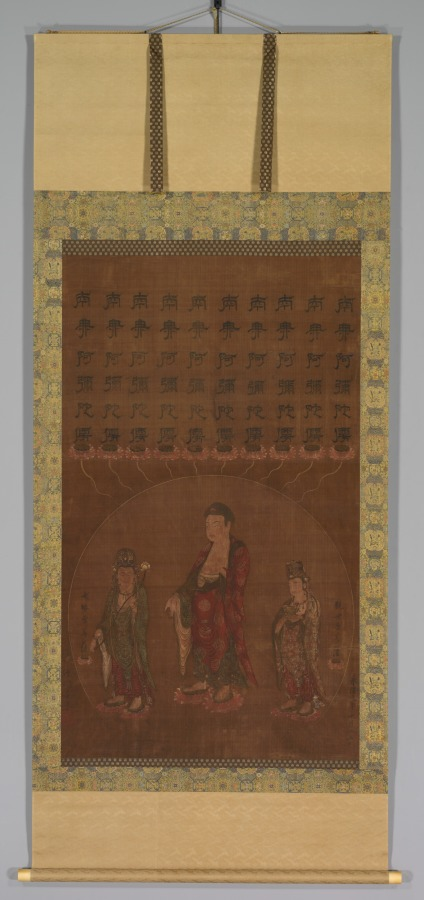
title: Buddha Amitābha with Two Attending Bodhisattvas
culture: China, Southern Song dynasty (1127-1279)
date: 1200s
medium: Hanging scroll; ink and color on silk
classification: Painting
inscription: 南無阿彌陀佛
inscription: 沙門善導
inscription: 觀世音菩薩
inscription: 大勢至菩薩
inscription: 永隆元年十月十五日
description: The supreme deities that rule over the Western Paradise—Amitābha (阿彌陀 in Chinese), Avalokiteśvara (Guanyin 觀音), and Mahāsthāmaprāpta (Dashizhi 大勢至)—are here enclosed within a circle of light. To secure entry into that paradise for Buddhist followers of the Pure Land sect, one must recite the phrase namo amituofo (南無阿彌陀佛, Homage to the Buddha Amitābha). Here the phrase is repeated 10 times in calligraphy above the figures, reinforcing the need for continual recitation.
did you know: Each line of calligraphy, which invokes the Buddha's name, emerges from a lotus blossom.